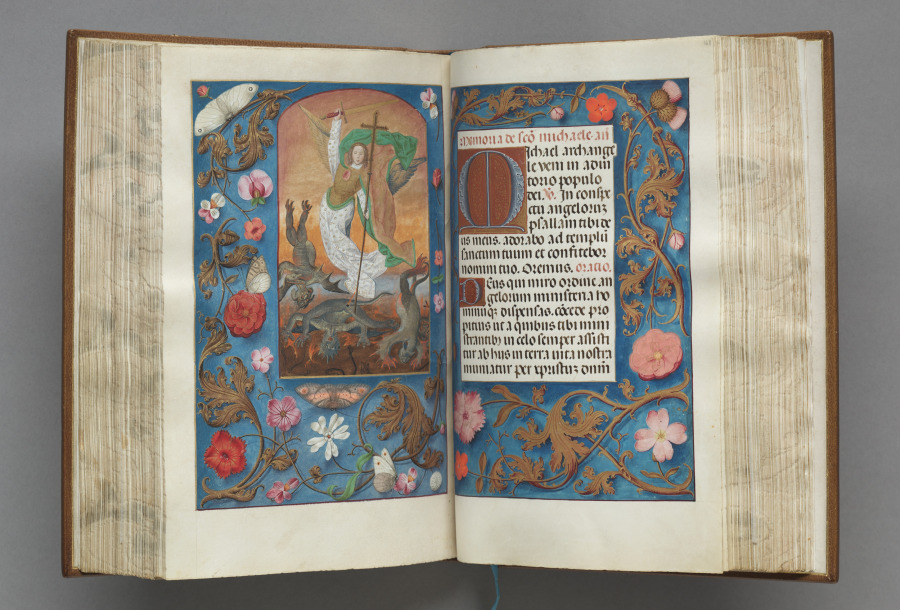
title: Hours of Queen Isabella the Catholic, Queen of Spain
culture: Flanders, Bruges and Ghent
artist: Master of the First Prayerbook of Maximillian (Flemish, c. 1444–1519)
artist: and Associates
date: c. 1500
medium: ink, tempera, and gold on vellum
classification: Bound Volume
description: The original owner of this exquisite book of hours was Queen Isabella of Spain, who sponsored Christopher Columbus's exploratory voyage to the Americas. Eventually this book found its way to the New World and was acquired by the Cleveland Museum of Art in 1963.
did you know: Isabella’s book of hours may have in its margins one of the first depictions of a daffodil in manuscript painting.